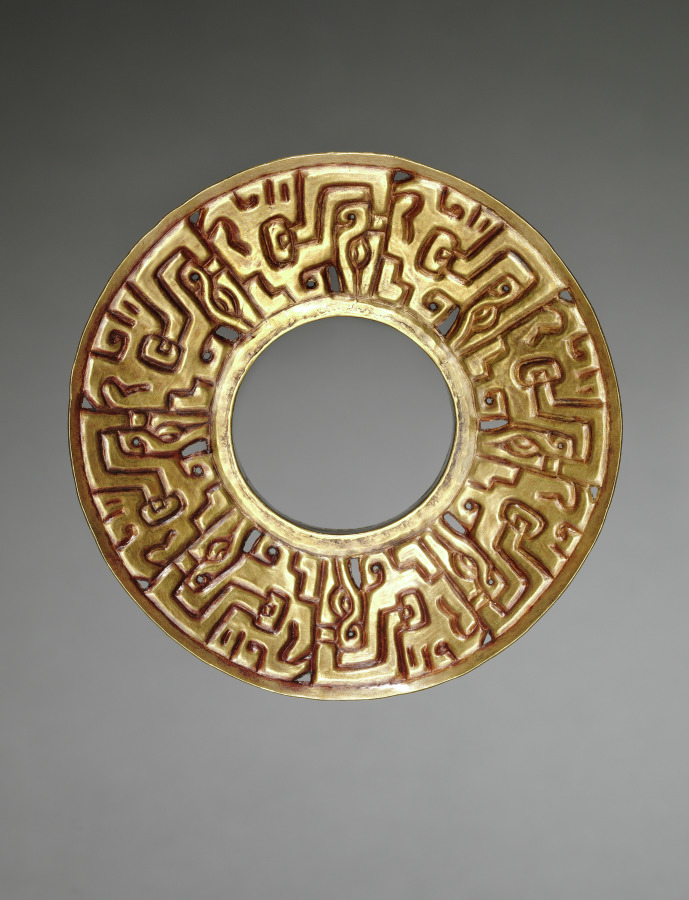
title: Ear Ornament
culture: Peru, North Highlands, Chavín de Huantar(?), Chavín style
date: c. 500–200 BCE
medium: hammered and cut gold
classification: Metalwork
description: There seems to be a link between Chavín religion and appearance of the Andes’ first large precious-metal objects, made using revolutionary new metallurgical processes. Chavín may have developed these technical innovations to express the inexpressible, the "wholly other" nature of its religion. In many areas, elite men and women wore the ornaments as emblems of their ties to this religion, and eventually were buried with them. These 16 objects, along with three others not in the museum’s collection, are said to have come as a group from Chavín itself.